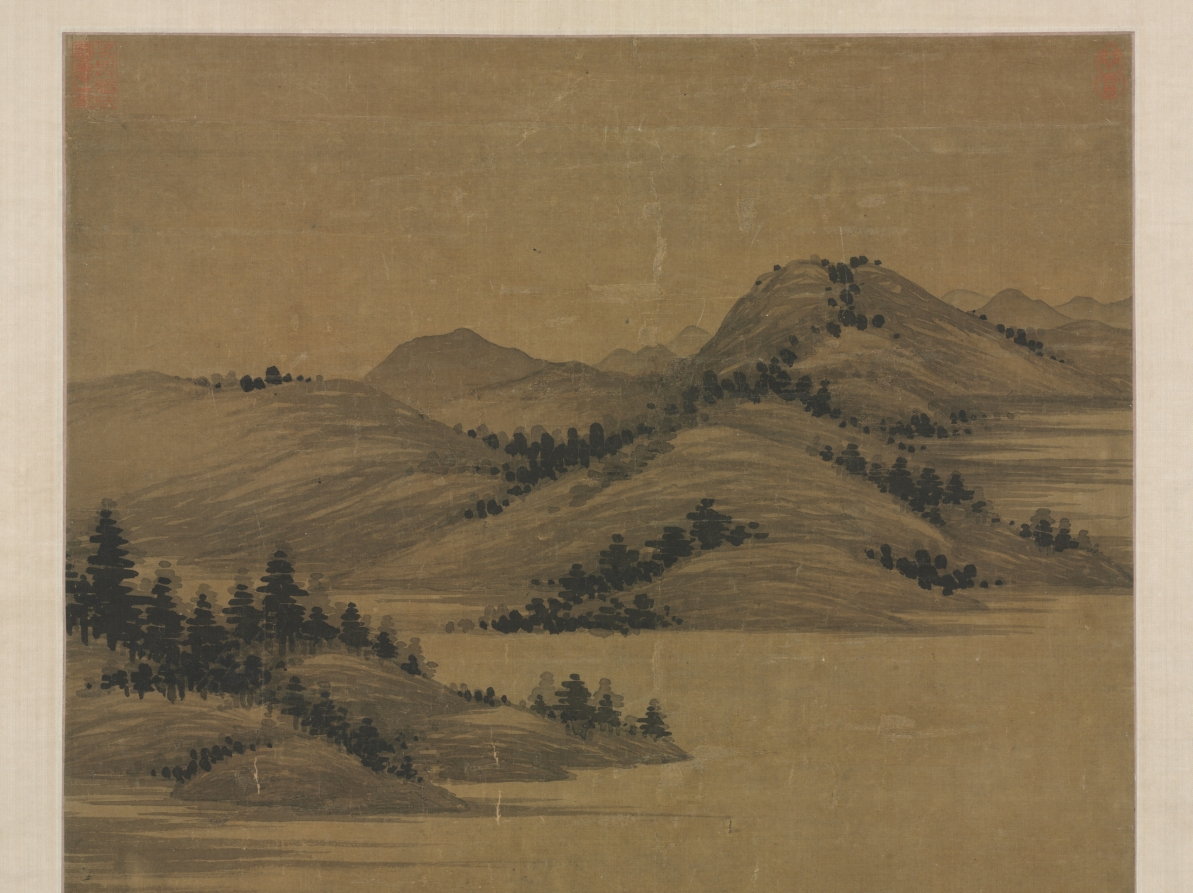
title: Fishermen-Hermits in Stream and Mountain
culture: China, Yuan dynasty (1271-1368)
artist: Zhao Yong (Chinese, c. 1289-c. 1362)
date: 1300s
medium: Hanging scroll; ink and color on silk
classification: Painting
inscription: 仲穆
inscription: [印] 吳興張氏圖書之記; [印] 心賞; [印] 張珩私印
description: In this typical southern two shores divided by a river composition, two fishermen, each seated in the stern of his covered houseboat, troll their hooks in the swirling water, holding short rods fitted with spooling reels. Zhao Yong was a son of the southern calligrapher and statesman Zhao Mengfu, who, like his father was a scholar-official in the Mongol-Yuan government. As public servants of the Yuan state and administration, scholar-artists like the Zhaos delighted in paintings that pictured them in nature as fishermen amid vistas of Jiangnan, which they considered their home.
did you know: The composition of two shores divided by a river was mostly famously associated with the Yuan painter Ni Zan.